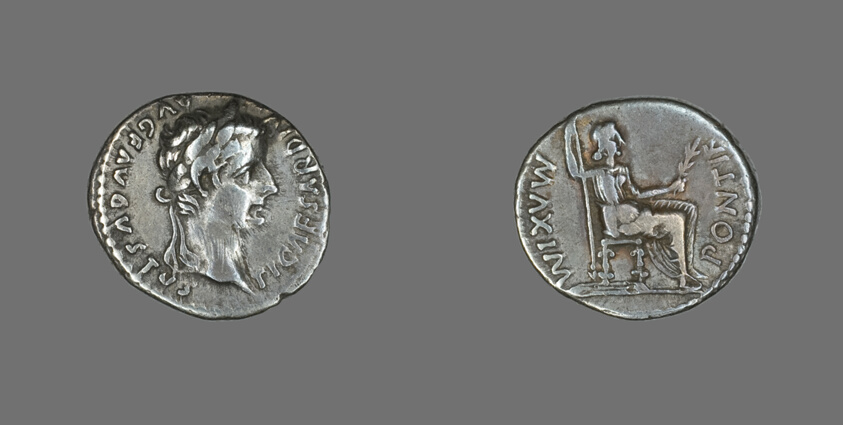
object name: Coin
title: Denarius (Coin) Portraying Emperor Tiberius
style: roman (ancient, style or period), ancient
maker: Roman, minted in Lyons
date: 14-37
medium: Silver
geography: Roman Empire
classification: coin; ancient art